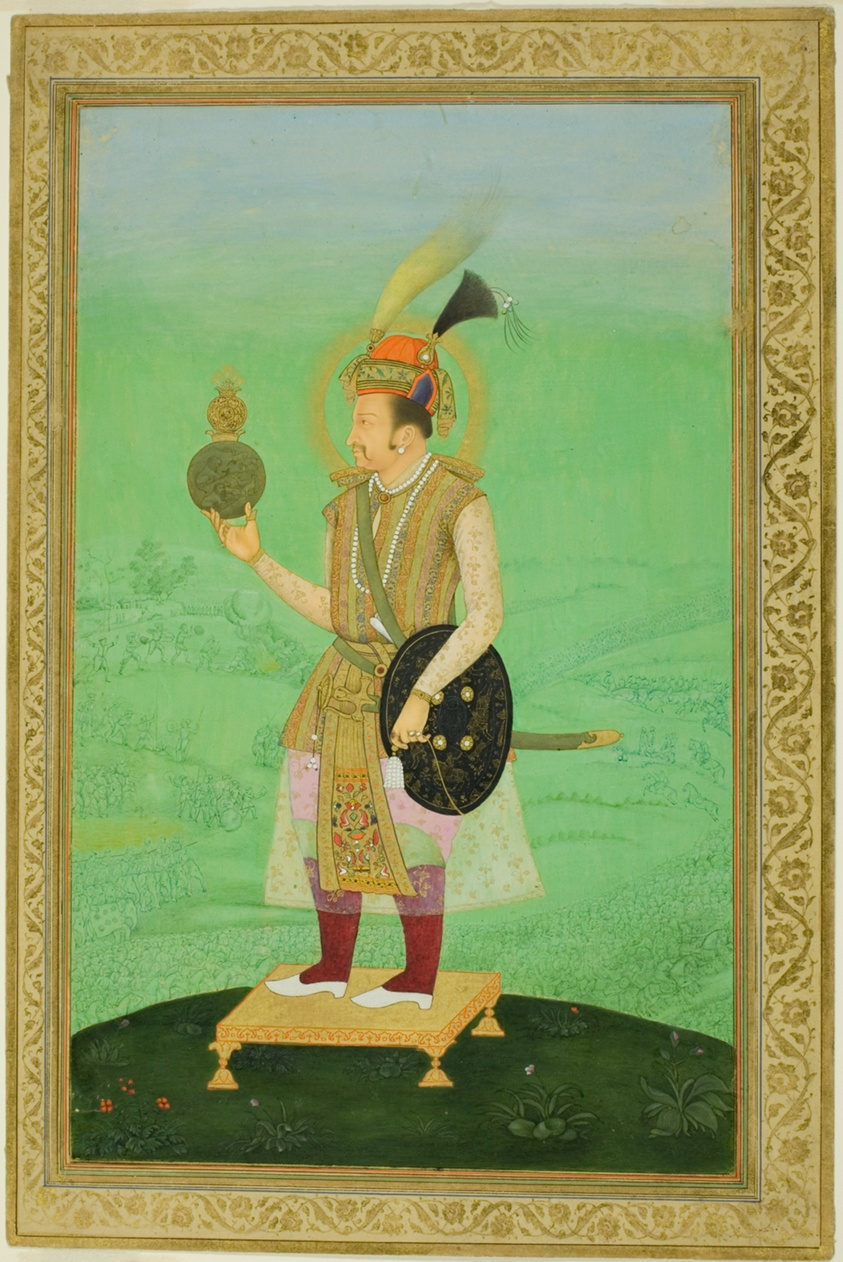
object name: Painting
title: Portrait of Emperor Jahangir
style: South Asian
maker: India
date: c. 1800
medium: Opaque watercolor and gold on paper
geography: India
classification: painting; asian art